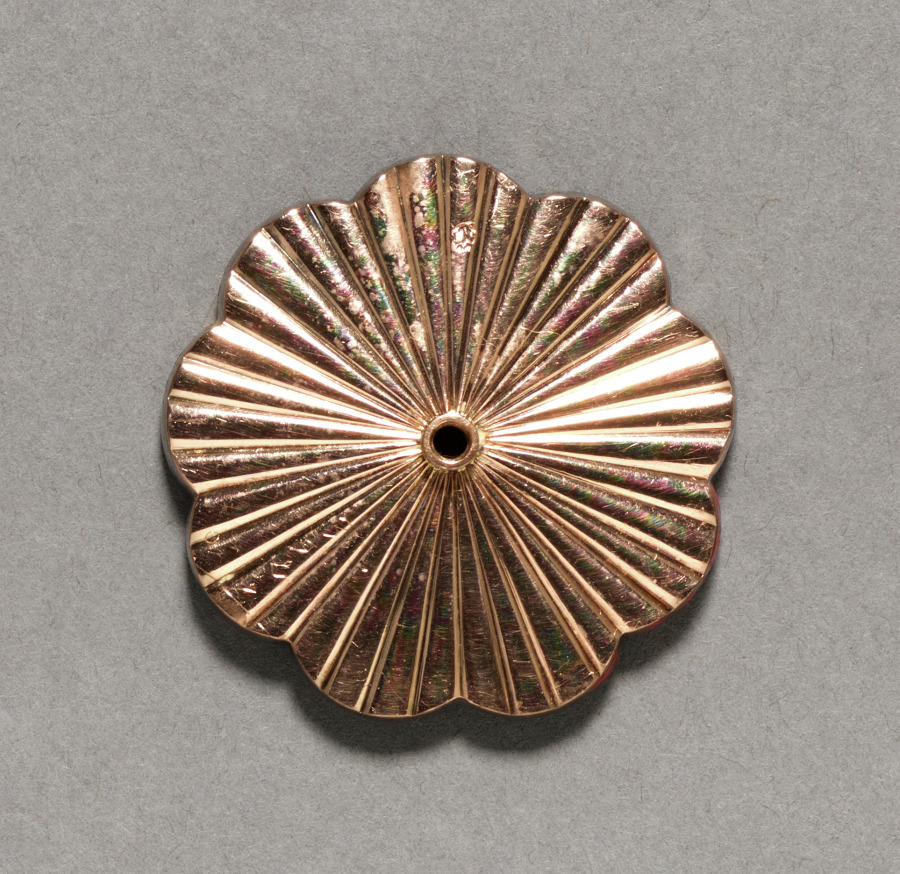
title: Button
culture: Russia, St. Petersburg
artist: firm of Peter Carl Fabergé (Russian, 1846–1920)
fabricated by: August Wilhelm Holmström (Russian, 1929–1903)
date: after 1896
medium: gold, enamel, diamonds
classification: Miscellaneous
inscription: inscribed: double-headed eagle; Fabergé; St. Petersburg, Moscow (all in Cyrillic; inside lid of box).